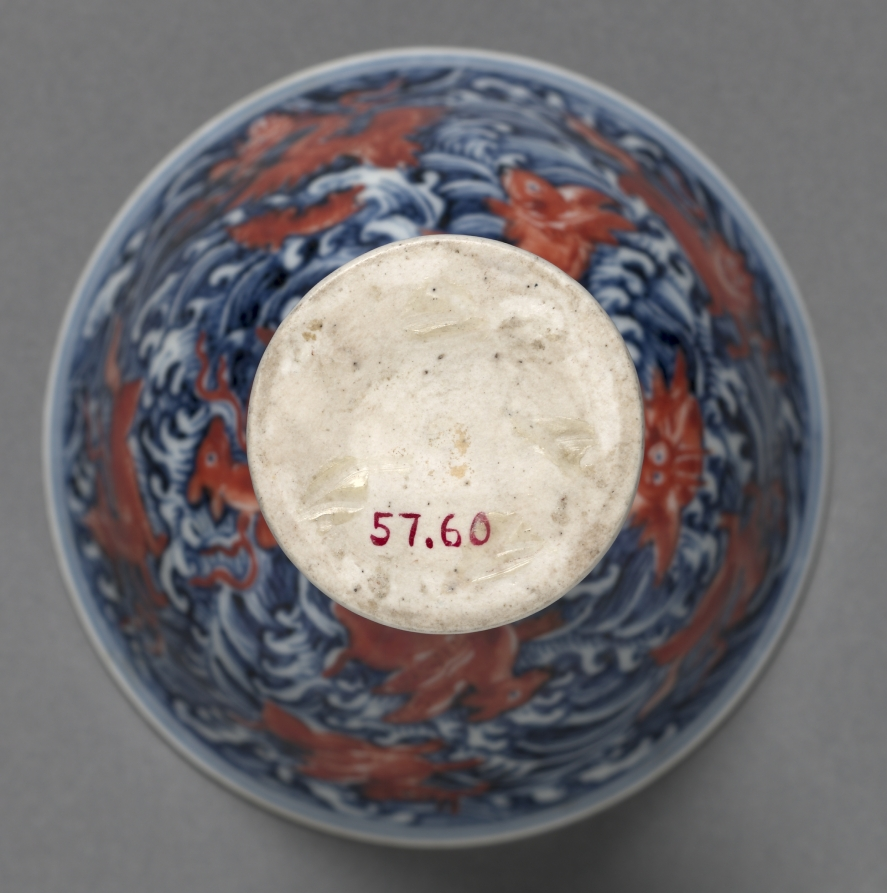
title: Stem Cup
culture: China, Jiangxi Province, Jingdezhen, Ming dynasty (1368–1644), Xuande mark and period (1426–35)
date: 1426–35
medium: porcelain with underglaze blue and overglaze red enamel decoration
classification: Ceramic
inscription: 大明宣德年製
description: These two Ming imperial wares [CMA 1957.60 and CMA 1957.61] are among the smallest, but most precious, of the museum's holdings in Chinese ceramics. The luminous glaze, gestural freedom, and vibrant color are perfectly unified to fit the delicate shapes of these luxury items.